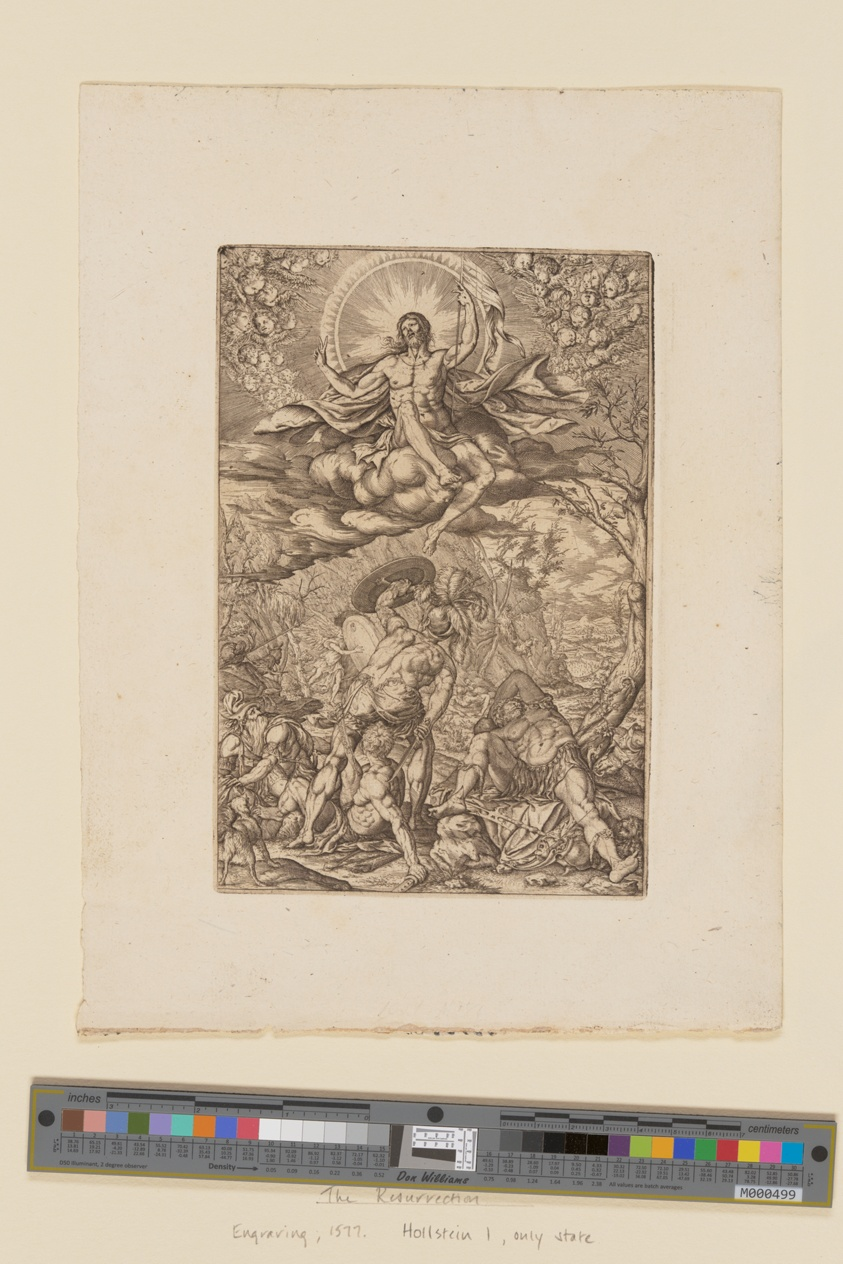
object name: Print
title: The Resurrection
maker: Melchior Meier (German, active c. 1572–1582)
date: 1577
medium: Engravig on ivory laid paper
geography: Germany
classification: engraving; paper; print; prints and drawing